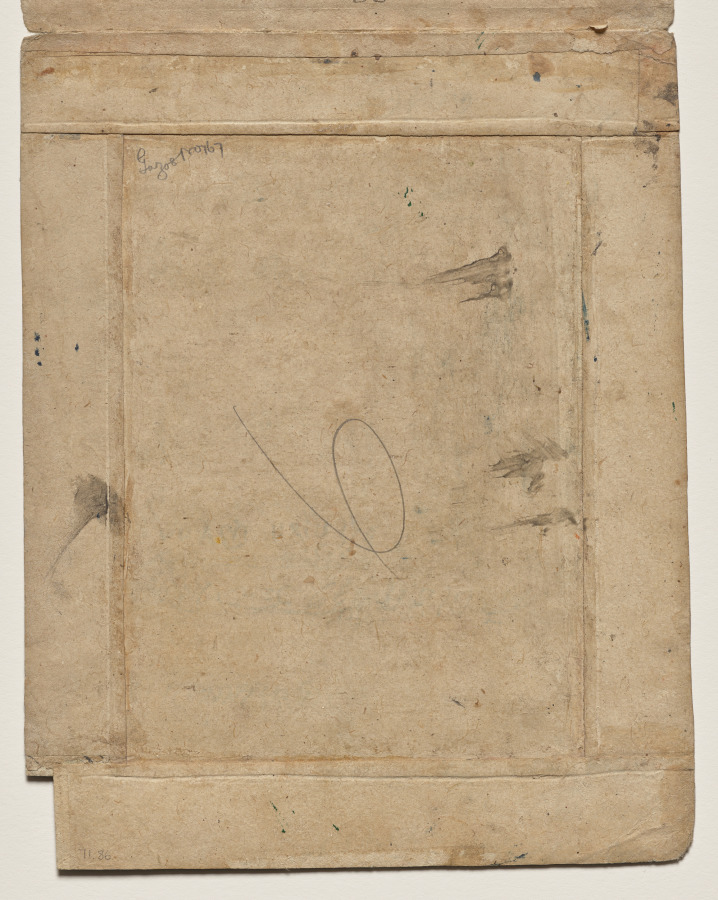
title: The lovelorn heroine, from a Sat Sai of Bihari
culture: Northern India, Pahari kingdoms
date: 1780–90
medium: Gum tempera and gold on paper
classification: Painting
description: The Sat Sai is a collection of poems mainly describing the beauty of women in a range of emotional states. The heroine of this poem sits against a tree that is in full flower, like her, but her lover is absent, and other girls walk by, gossiping. Not coincidentally, her dress matches the color of the blossoms, and no bees come to pollinate.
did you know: The Sat Sai was written for Raja Jai Singh I of Amber (r. 1625–67).